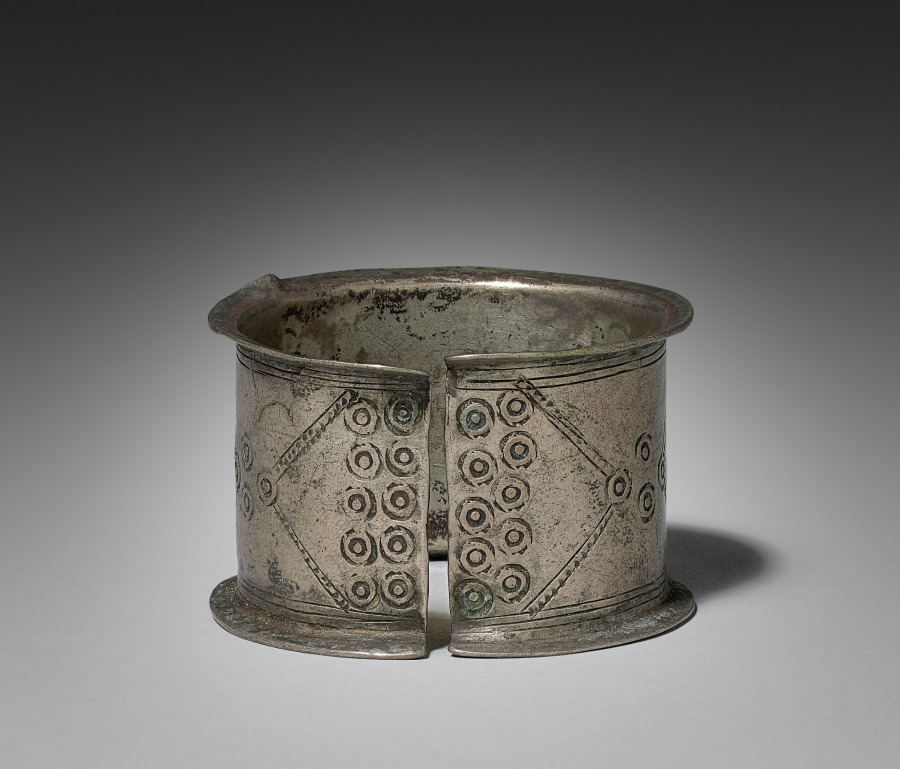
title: Bracelet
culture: India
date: 1800s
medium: silver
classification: Jewelry